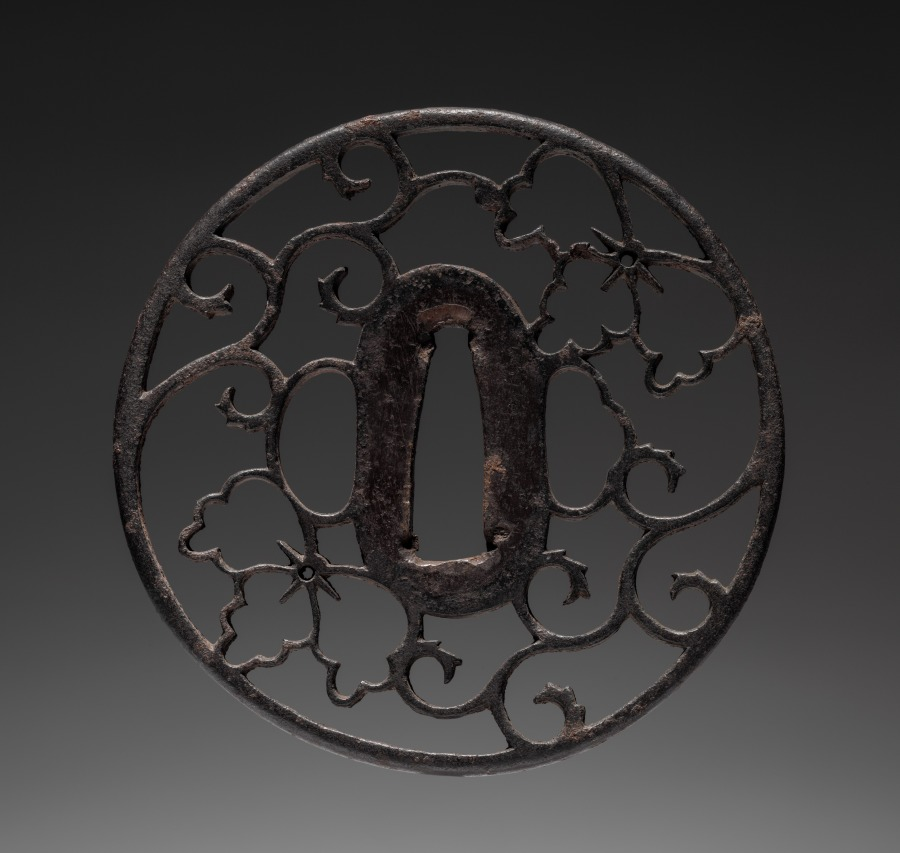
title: Sword Guard (Tsuba)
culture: Japan, Edo period (1615–1868)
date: 1615–1868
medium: iron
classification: Arms and Armor